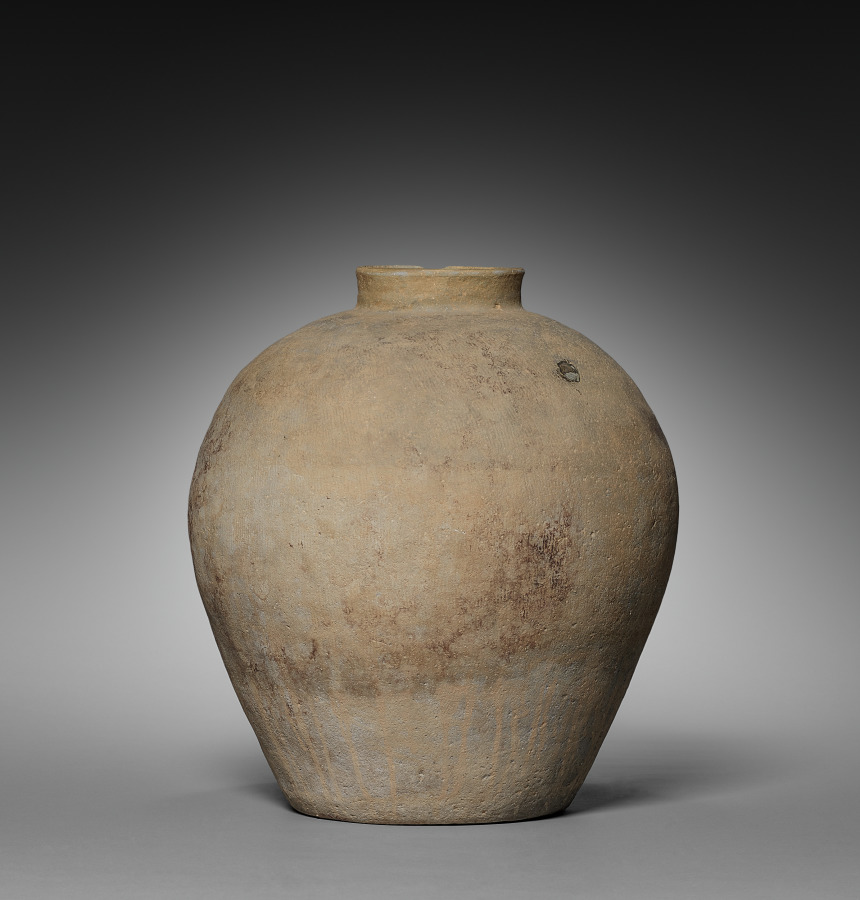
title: Burial Urn with Cover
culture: Korea, Three Kingdoms period (57 BCE–668 CE)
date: 300s–500s CE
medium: earthenware with impressed design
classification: Ceramic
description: Produced in closed kilns built on hillsides during the Three Kingdoms period, this lidded jar once contained the cremated remains of the dead. This type of burial jar became widespread after the introduction of Buddhism, as cremation became a common practice in Korea.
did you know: Closed kilns built on hillsides became widely used for producing this type of pottery vessel in Korea during the Three Kingdoms period.